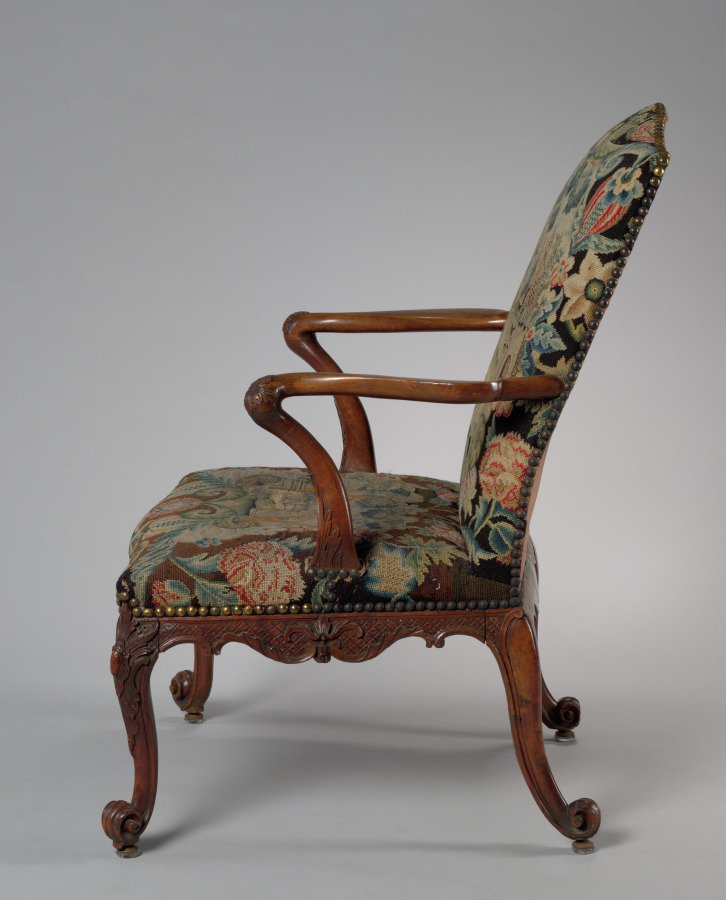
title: Armchair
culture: England, 18th century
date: 1760–1765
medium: mahogany upholstered in needlework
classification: Furniture and woodwork